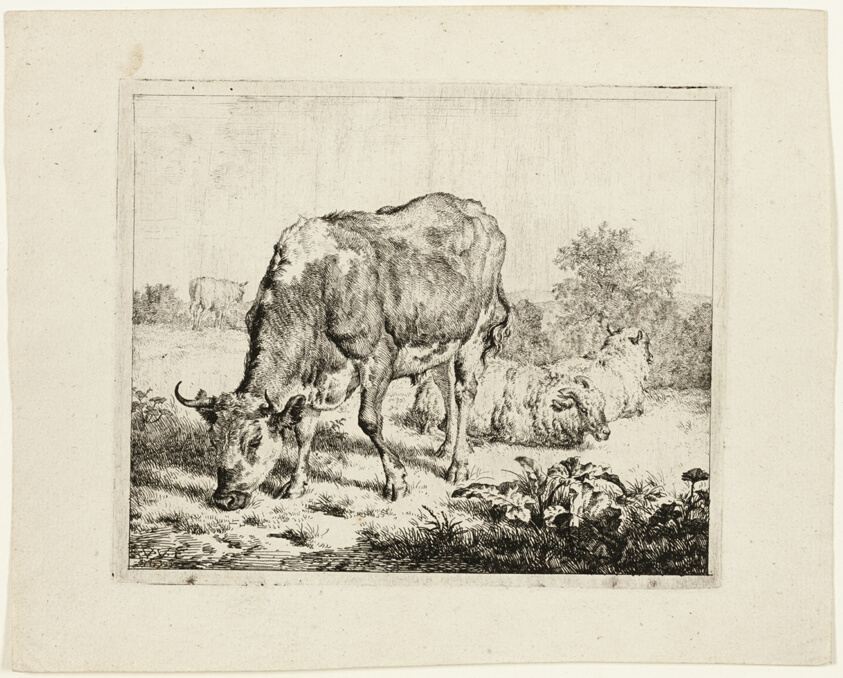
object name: Print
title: Bull Grazing and Three Sheep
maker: Adriaen van de Velde (Dutch, 1636-1672)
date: 1670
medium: Etching in black on paper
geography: Netherlands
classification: print; prints and drawing